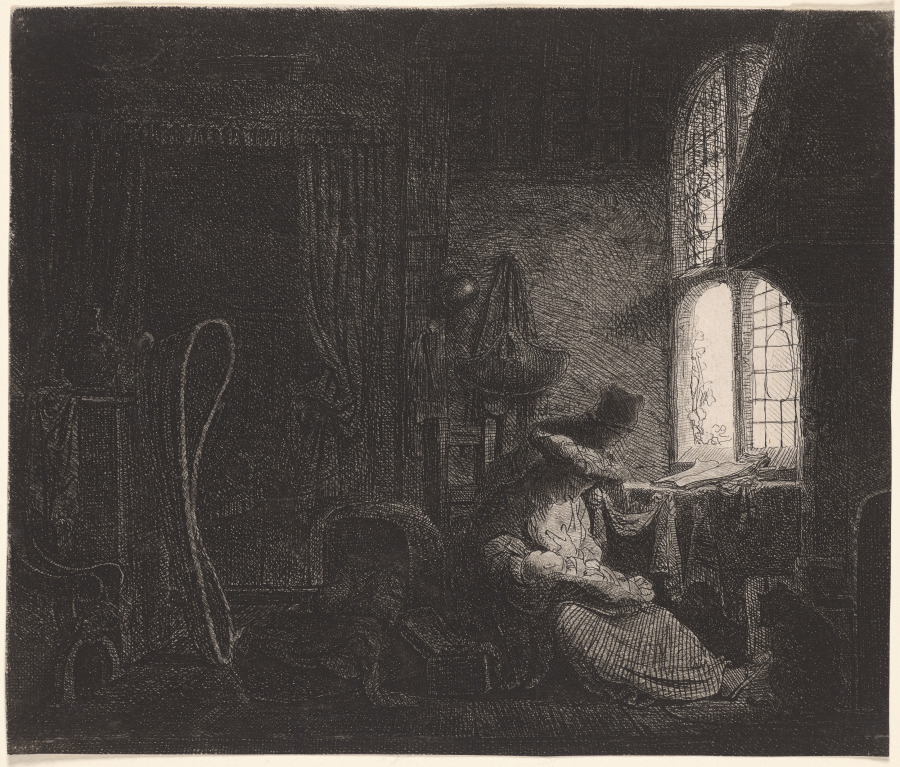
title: The Holy Family in an Interior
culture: Netherlands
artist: Ferdinand Bol (Dutch, 1616–1680)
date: 1643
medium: etching, drypoint and engraving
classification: Print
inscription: Watermark: Strasbourg Lily (close, but not identical to Hinterding A-L’-b, Ill. Vol. 3, p. 395)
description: Ferdinand Bol made this etching just one year after he left the studio of his famous teacher, Rembrandt van Rijn, adopting his master’s motif of a dark domestic interior as the setting for a biblical scene. Here, Mary, Joseph, and Jesus sit within a contemporary Dutch interior with the light from a window the sole source of illumination, revealing an open book at a small desk. The rest of the room is in deep shadow. As Mary nurses the child, Joseph stands by with a swaddling cloth. To their left is a curtained cupboard bed of the type commonly found within Dutch living rooms, a bassinet, a nursing basket set on its end, a chair, and various vessels and containers. To the right of the family is a hearth and the barely discernible cat, calmly watching the scene. Bol’s broad, meshed lines simultaneously darken the room and reveal the various, closely observed domestic objects related to caring for an infant.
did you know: The tall basket laid on its end visible in this composition is a bakermat, a legless couch typical in 17th-century Netherlands that was placed on the floor for nursing.